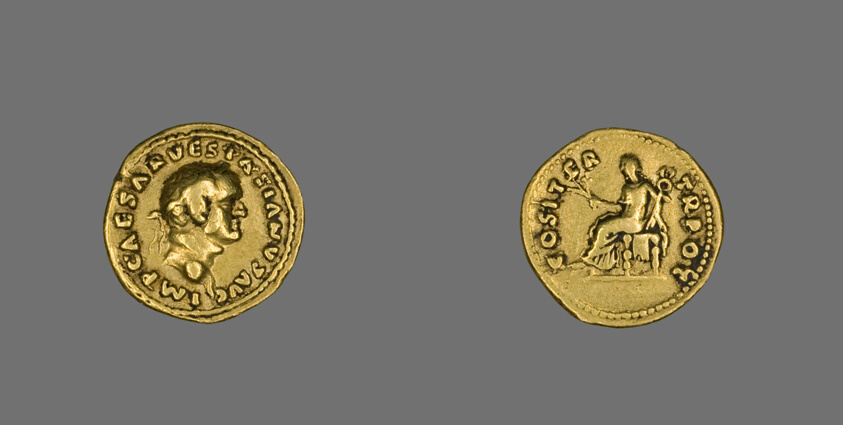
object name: Coin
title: Aureus (Coin) Portraying Emperor Vespasian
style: imperial (roman), ancient, roman (ancient, style or period)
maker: Roman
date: 70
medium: Gold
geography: Roman Empire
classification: coin; ancient art; struck